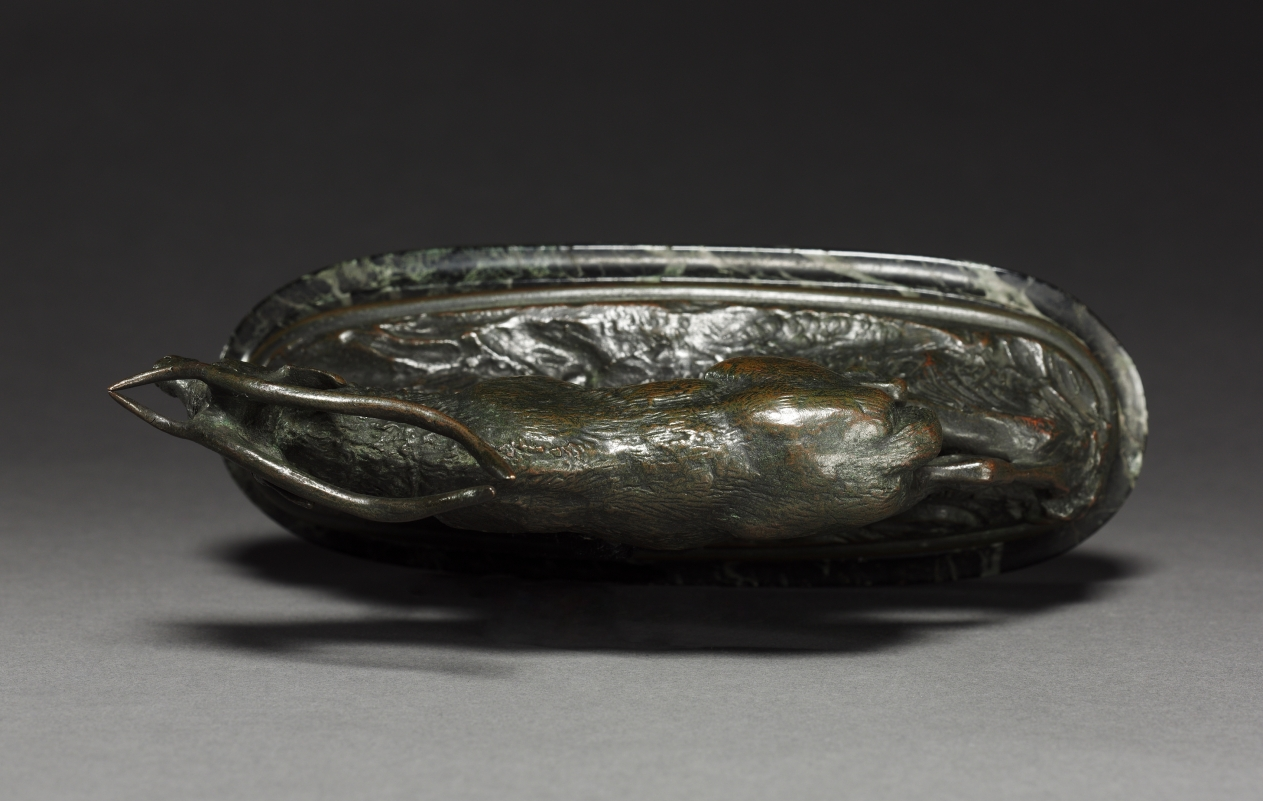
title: Axis Deer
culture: France, 19th century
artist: Antoine-Louis Barye (French, 1796–1875)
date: 19th century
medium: bronze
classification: Sculpture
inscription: Signed: "Barye"; faintly inscribed in small letters: "BARYE 21"